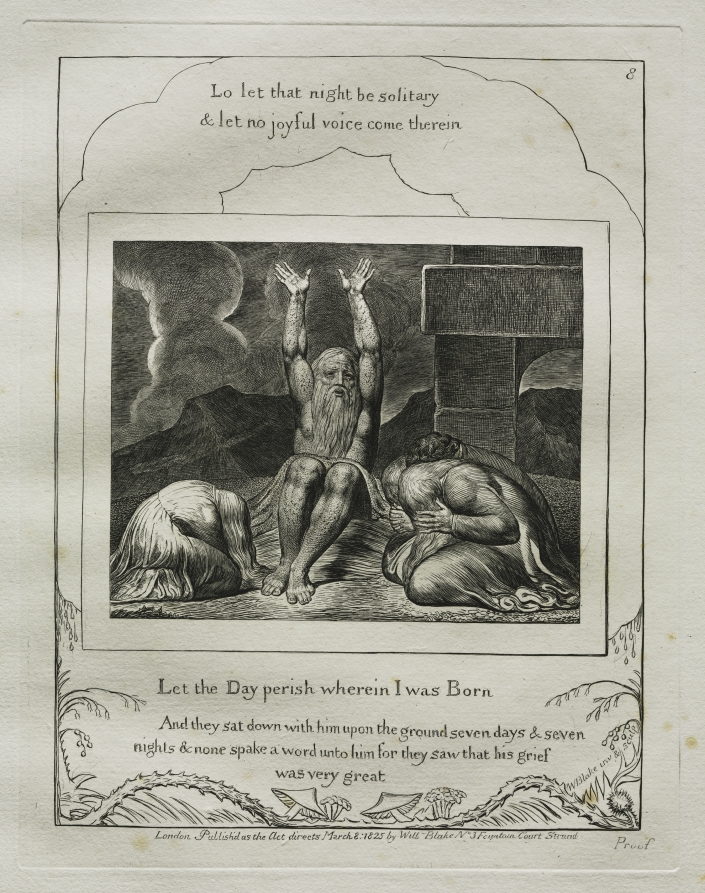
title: The Book of Job: Pl. 8, Let the Day perish wherein I was Born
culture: England, 18th century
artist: William Blake (British, 1757–1827)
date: 1825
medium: engraving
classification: Portfolio